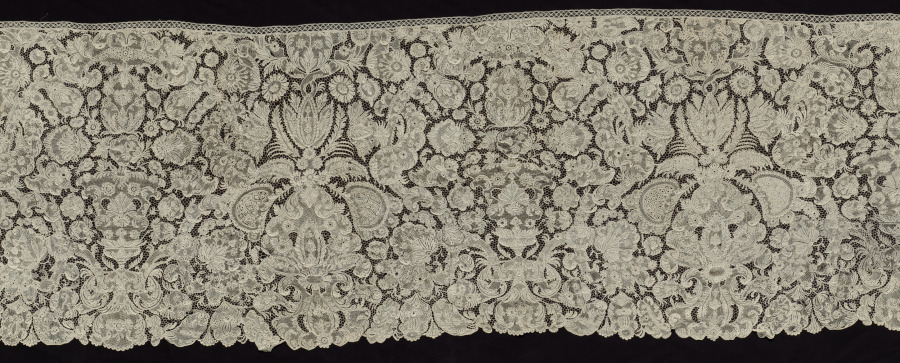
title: Lace Panel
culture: France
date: 1740–50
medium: Silk or cotton: needle lace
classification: Lace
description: The motifs in this lace panel were created separately and then joined with plaits and picot filling.